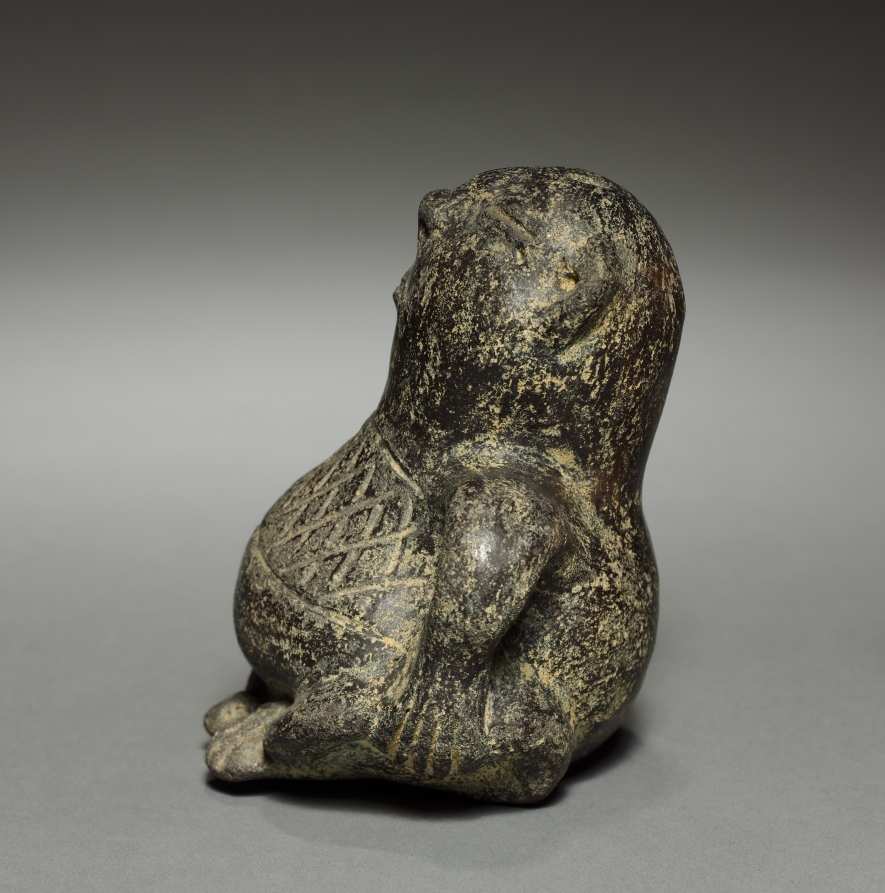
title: Seated Figure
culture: Colombia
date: before 1921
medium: pottery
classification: Ceramic